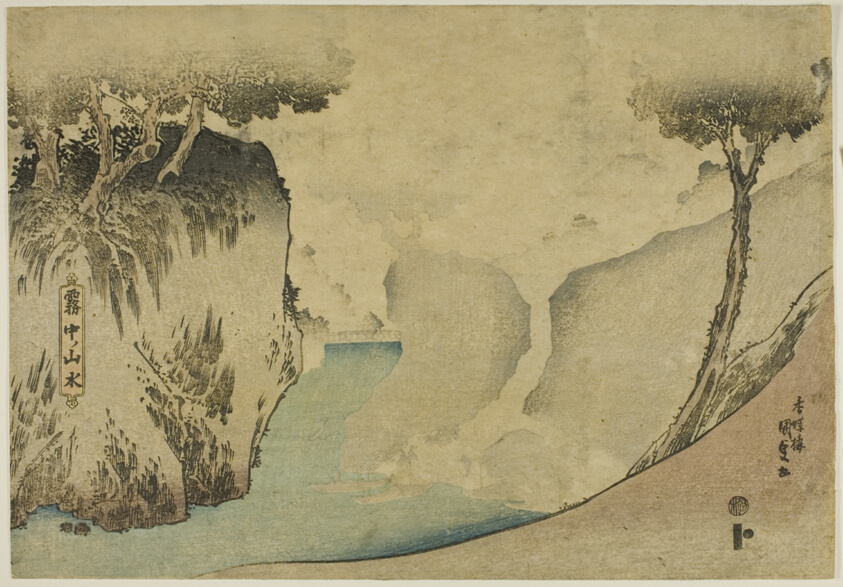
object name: Print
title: Mountain Landscape in the Mist (Muchu no sansui)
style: Japanese (culture or style)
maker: Utagawa Kunisada I (Toyokuni III) (Japanese, 1786-1864)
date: c. 1830/44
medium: Color woodblock print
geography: Japan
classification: woodblock print; print